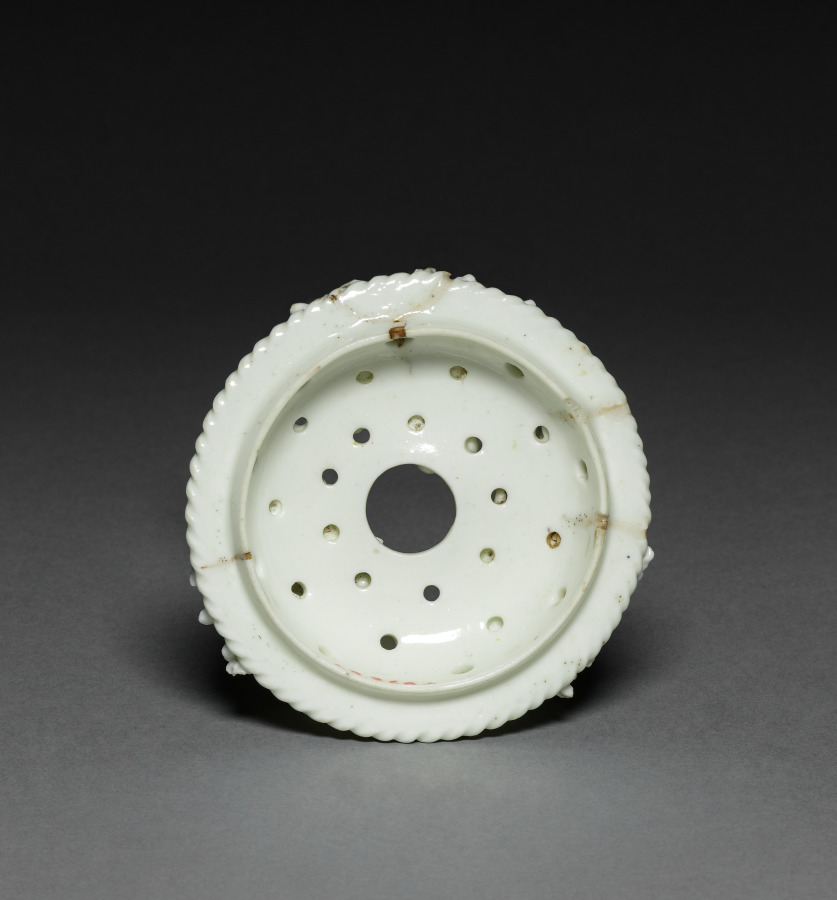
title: Cover for a Potpourri Vase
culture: France, Saint Cloud, 18th century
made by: Saint Cloud Porcelain Factory (French)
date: mid-1700s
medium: soft-paste porcelain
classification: Ceramic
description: This cover is part of a pair of covered vases that were created to contain potpourri, a mixture of flowers, herbs, and spices emitting ambient fragrance. This specific function offered a particularly fertile ground for the development of French porcelain, as manufactories experimented with forms, surface ornamentations, and placement of perforations.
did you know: Prior to Saint-Cloud's development of soft-paste porcelain in the 1690s, rumors spread throughout Europe that the prized material was made by burying a variety of materials, including lobster shells, in the ground for eighty years.